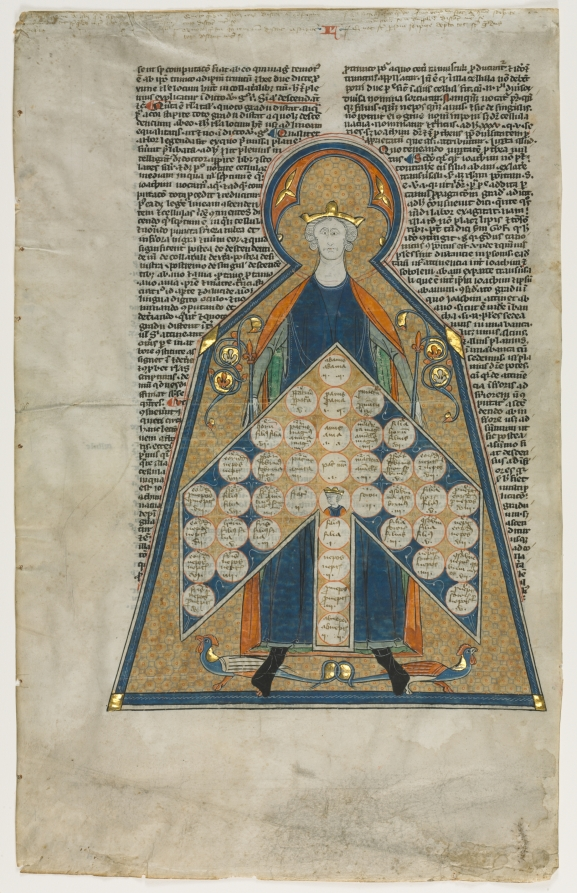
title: Leaf Excised from Henry of Segusio's "Summa Aurea": Table of Consanguinity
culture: France, Paris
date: c. 1280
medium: ink, tempera, and gold on parchment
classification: Manuscript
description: Henry of Segusio, a professor of law at the universities of Bologna and Paris, died at Lyon in 1271. His Summa Aurea (Golden Summary) was an early treatise on canon law (church law) that was so important that it was repeatedly copied after his death. This leaf comes from one such early copy.